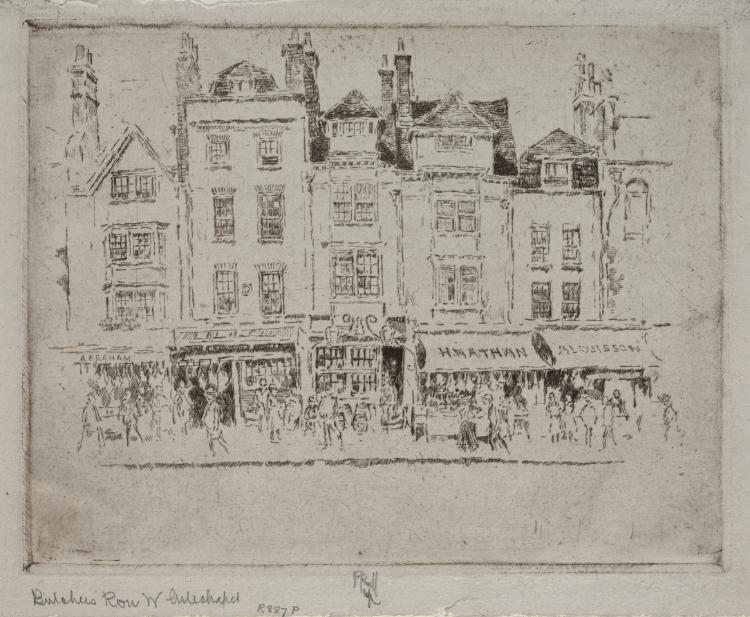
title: Butcher's Row, Whitechapel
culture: America, early 20th Century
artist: Joseph Pennell (American, 1857–1926)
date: 1904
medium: etching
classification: Print